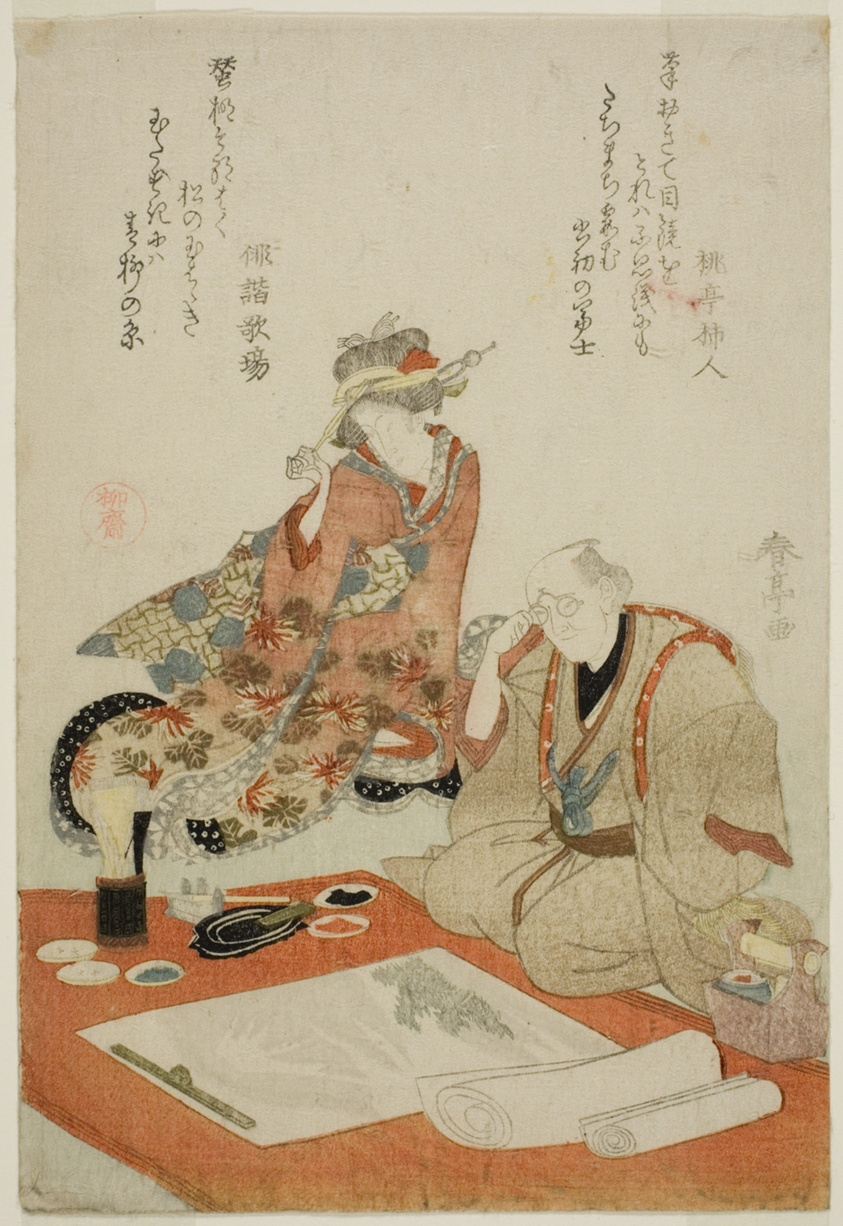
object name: Print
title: Examining the Painting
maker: Katsukawa Shuntei (Japanese, 1770-1820)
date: 19th century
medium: Color woodblock print; surimono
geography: Japan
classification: woodblock print; print; asian art